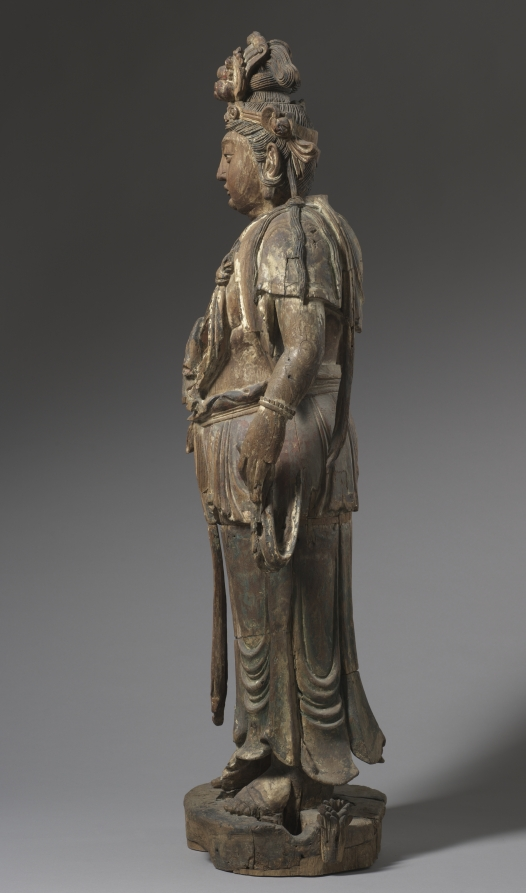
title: Standing Bodhisattva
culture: China, Jin dynasty (1115-1234)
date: 1200s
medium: wood with traces of polychromy and gold leaf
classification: Sculpture